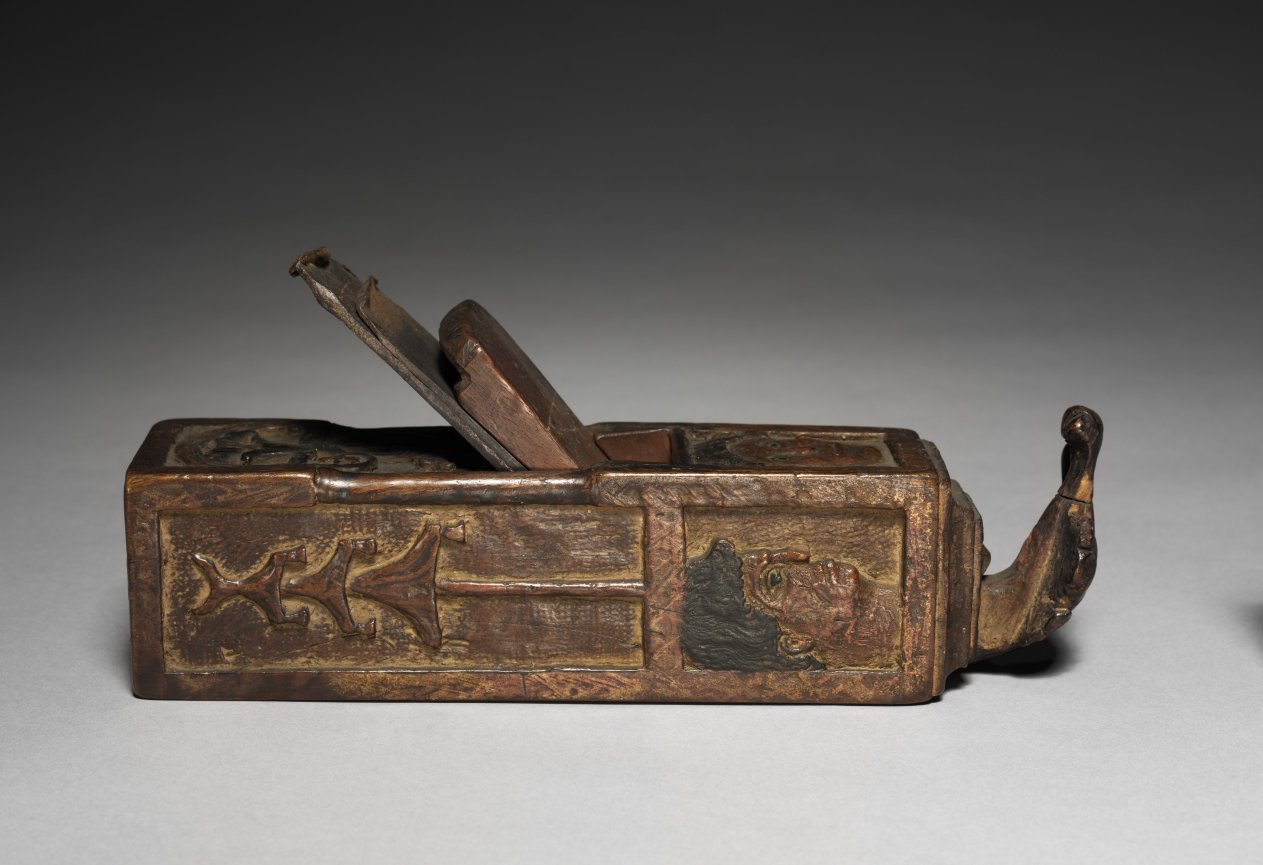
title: Carpenter's Plane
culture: Italy, late 16th century ?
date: late 1500s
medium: wood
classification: Tool